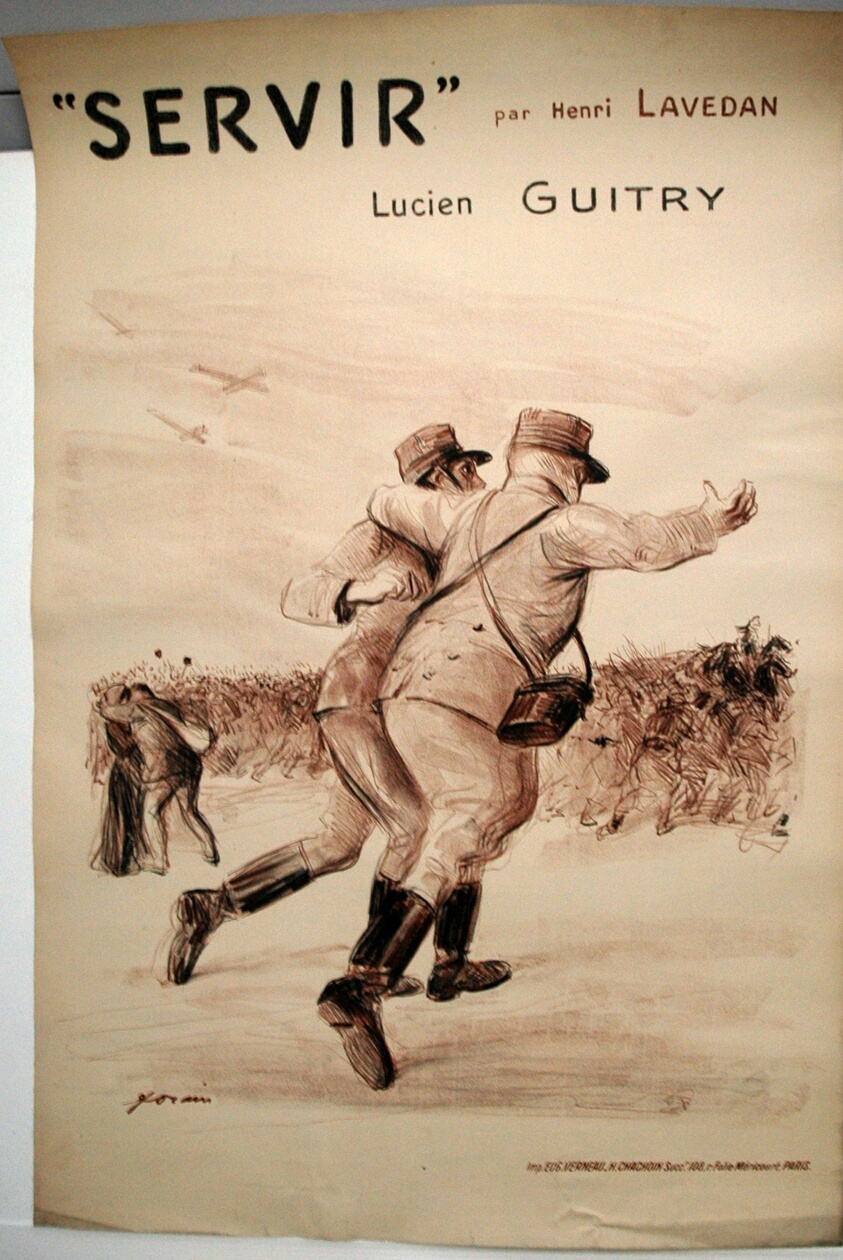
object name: Print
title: To Serve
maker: Jean Louis Forain (French, 1852-1931); Printed by Eugene Verneau & Henri Chachoin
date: 1913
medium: Color lithograph on cream wove paper laid down on linen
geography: France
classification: lithograph; print; prints and drawing